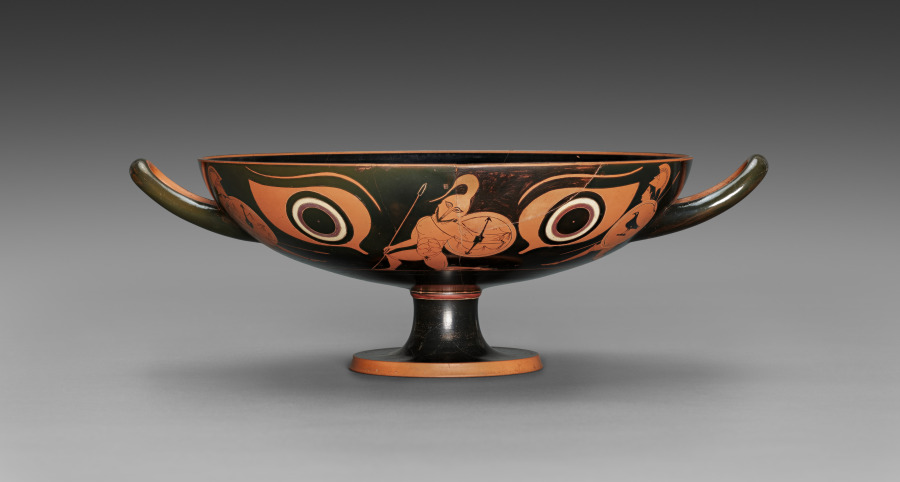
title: Red-Figure Eye Cup: Warriors (A), Musician and Youths (B)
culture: Greek, Attic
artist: attributed to Psiax (Greek, Attic, active c. 525–505 BCE)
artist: and Group of Leipzig T 3599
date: c. 520 BCE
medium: ceramic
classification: Ceramic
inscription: Graffito on underside of foot: Ζωιιλος [ZOILOS, perhaps the name of an owner]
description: Red-figure eye cups, like their more common black-figure brethren (including one in Cleveland), feature two large eyes on either side, producing a masking effect for drinkers. Typically, palmettes flank the eyes, with either a nose or figure at center. Here, the innovative painter Psiax, who worked in both black-figure and red-figure, moved the palmettes to the tondo and created three-figure compositions on each exterior side: two warriors converging on a fallen comrade (or enemy); and a youth playing a cithara for an audience of two. The experimental nature of early red-figure may explain the unusual spear and awkwardly twisted torso and lower leg of the central warrior.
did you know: The fallen warrior’s spear is done with added clay (shaft) and incision (head), not red-figure.